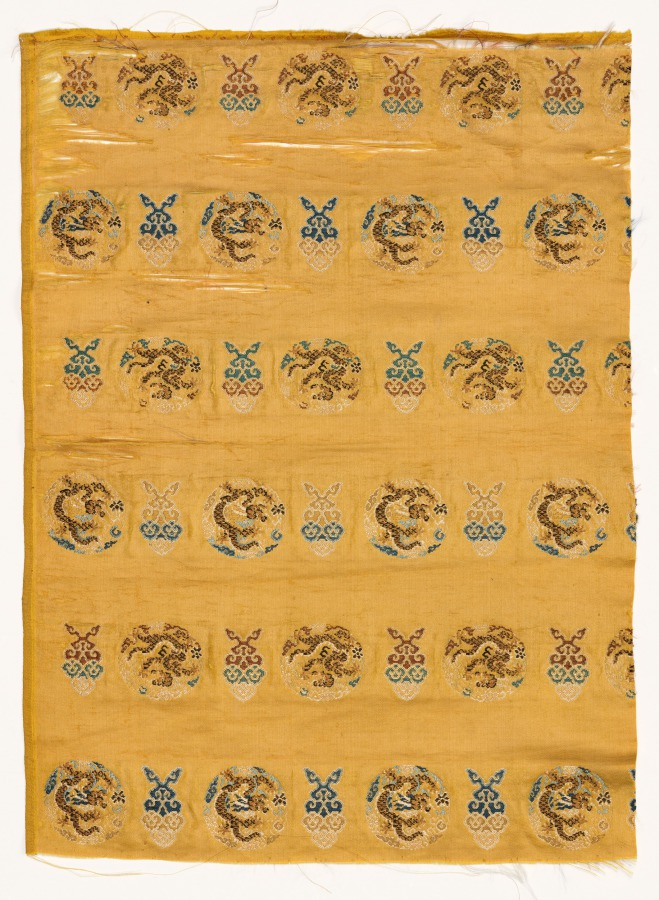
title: Fragment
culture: China, Qing dynasty (1644-1911)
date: 1700–1720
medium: silk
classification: Textile